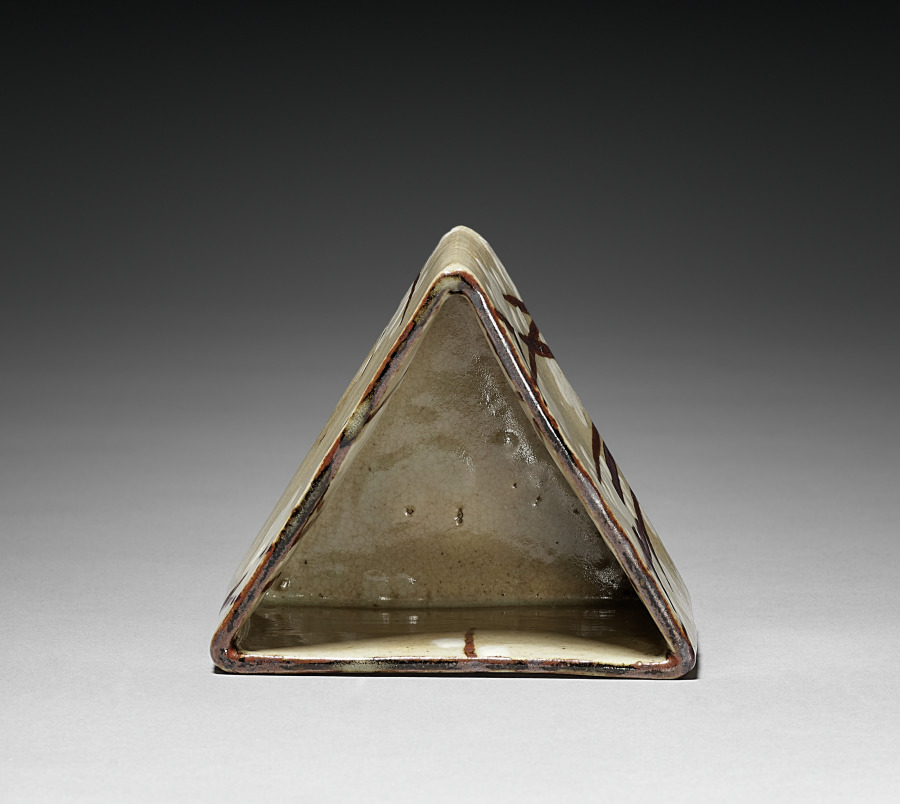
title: One of Five Serving Bowls (Mukozuke) with Prunus Design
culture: Japan, Edo period (1615–1868)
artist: school of Ogata Kenzan (Japanese, 1663–1743)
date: 1700s to mid-1800s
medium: Kyoto Ware: stoneware with underglaze iron oxide and slip decoration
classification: Ceramic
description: Note the rough, tan, clay bodies of these bowls with their deliberate irregularities. The design of branches was first painted in a black iron oxide, then the blossoms and buds in a white slip, followed by the application of a very thin transparent overglaze.